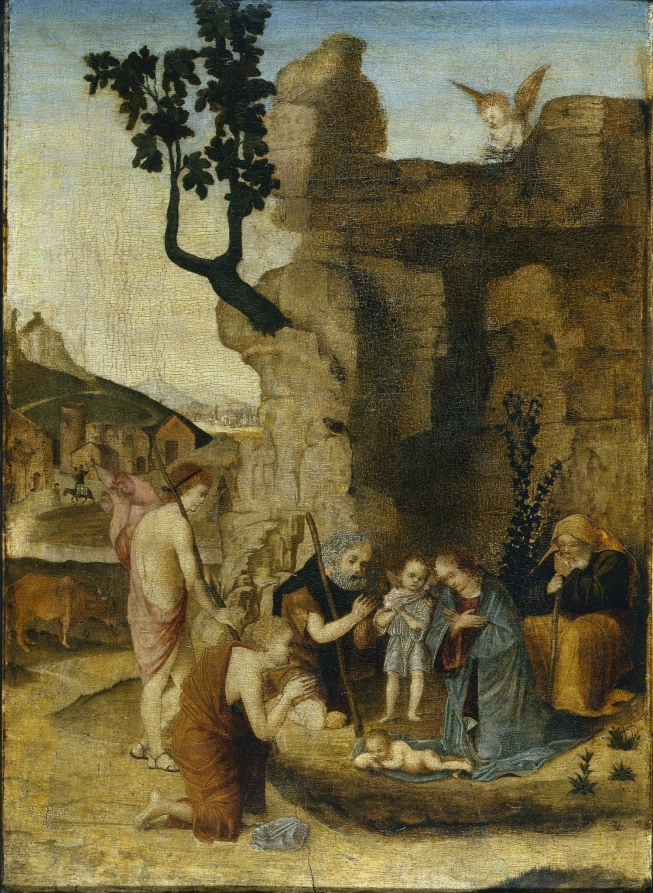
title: Adoration of the Shepherds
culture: Northern Italy, late 15th-early 16th Century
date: c. 1500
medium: oil on wood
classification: Painting